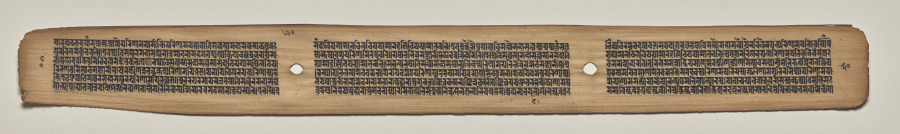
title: Text, folio 50 (verso), from a Manuscript of the Perfection of Wisdom in Eight Thousand Lines (Ashtasahasrika Prajnaparamita-sutra)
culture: Eastern India, Bihar, Vikramashila Monastery. Painting: Nepal, Kathmandu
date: Sunday, September 14, 1119 (year 239 of the Newar Samvat in the month of Ashvina)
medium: gum tempera and ink on palm leaves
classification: Painting